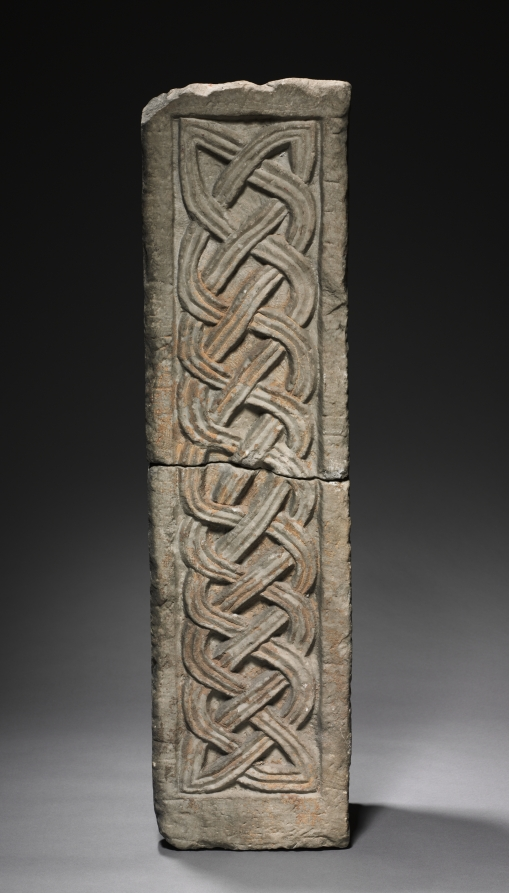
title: Transenna Post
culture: Lombardic, Italy, Rome, Migration period, 8th-9th Century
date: 700s-800s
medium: marble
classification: Sculpture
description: In Christian architecture a transenna is an openwork screen of stone or metal enclosing a shrine. These transenna elements were found in Rome; the posts were said to have been excavated on the Coelian Hill and may have originally formed part of the transenna of the Church of San Saba. The Lombards were an ancient Germanic-speaking tribe that settled in Italy after 568. Their artistic tradition was originally centered on small objects of personal adornment like buckles and brooches. After occupying Italy, the Lombards found themselves in contact with large-scale sculpture of classical and early Christian origin that, by the end of the 700s, they had learned to adopt and imitate, as seen here.